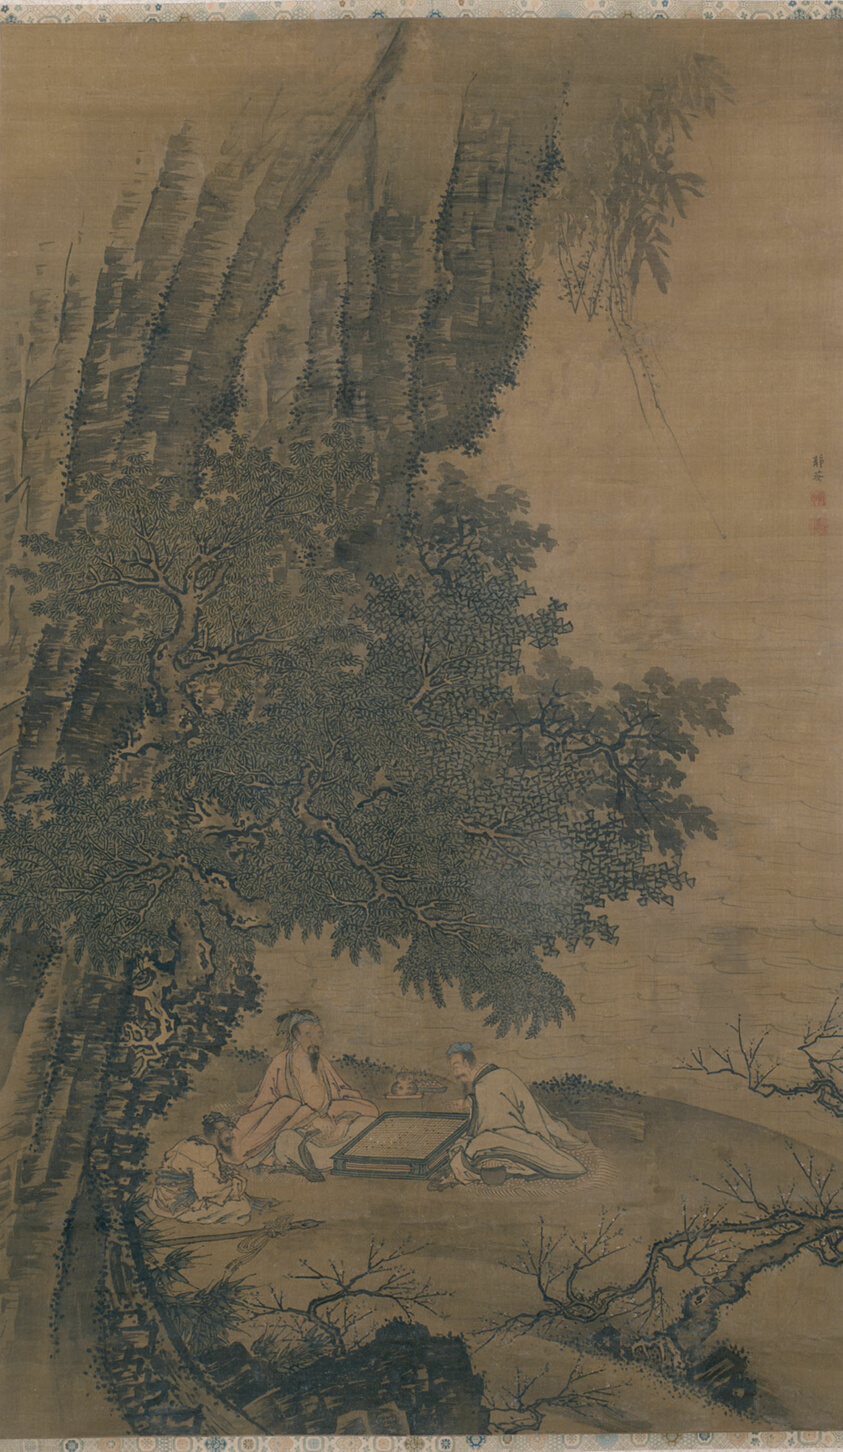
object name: Painting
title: Landscape with Daoist Immortals Playing Weiqi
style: Chinese (culture or style)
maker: Attributed to Dai Jin (Chinese, c.1388-1462)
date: Ming dynasty (1368–1644), 15th-16th century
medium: Hanging scroll; ink and colors on silk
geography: China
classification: hanging scroll; painting; asian art